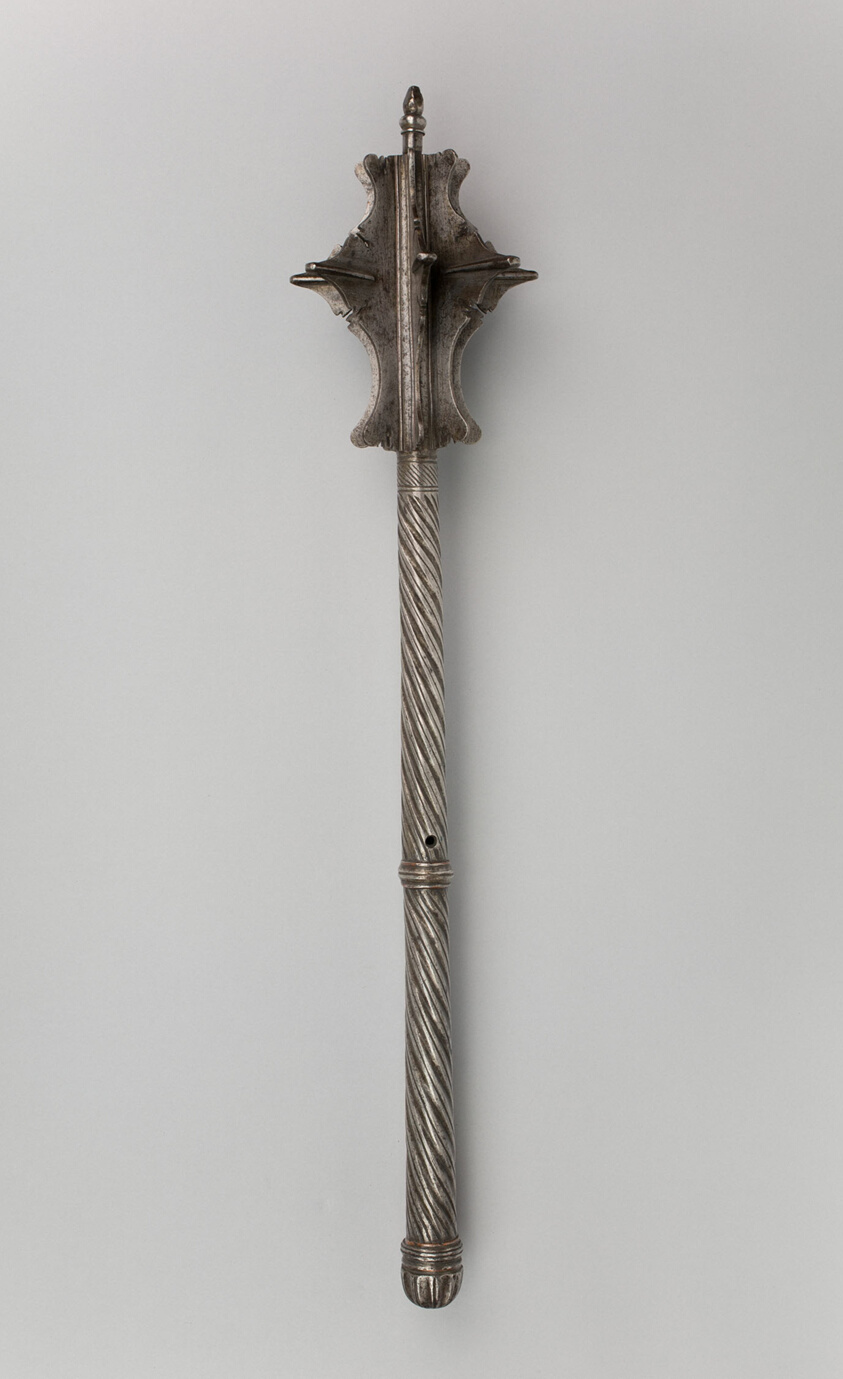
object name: Arms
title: Mace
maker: European, possibly German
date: c. 1540/50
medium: Steel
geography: Germany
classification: shafted weapon; arms; arms and armor